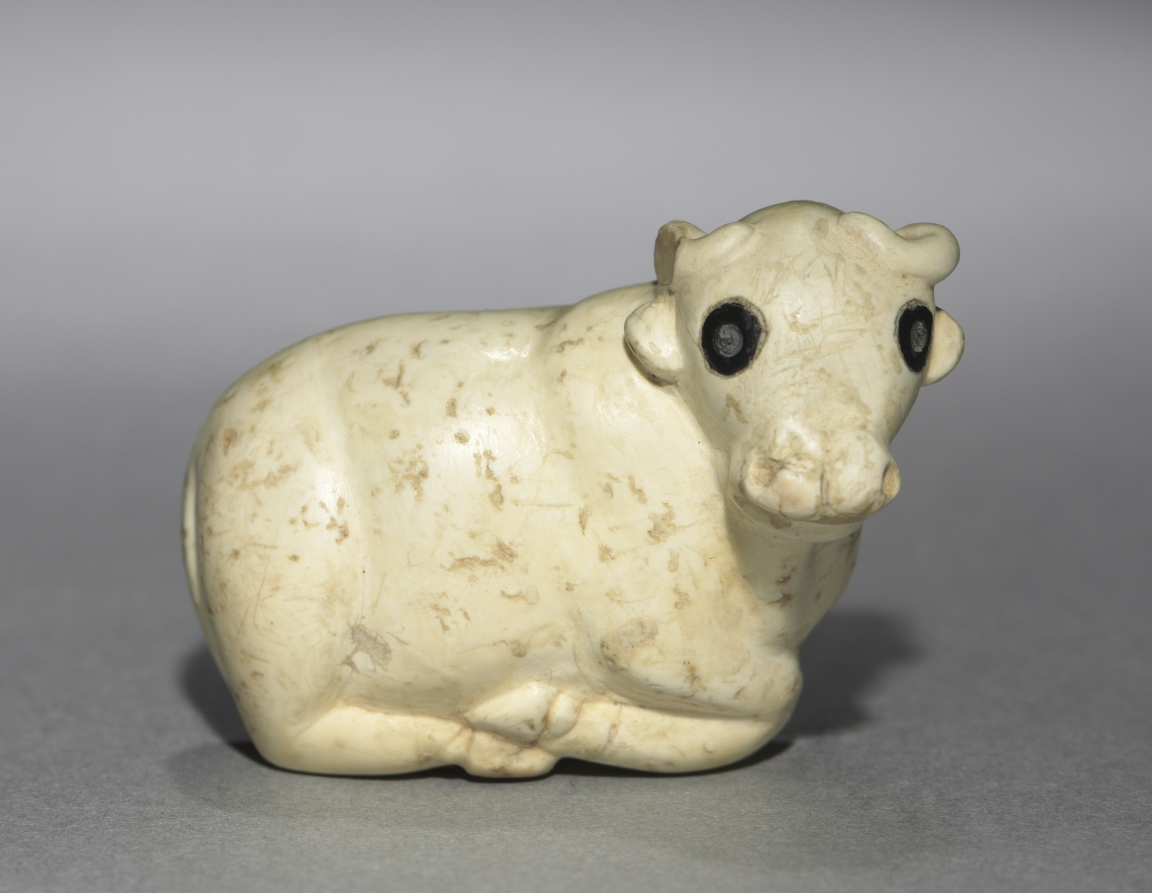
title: Amulet Seal in the Form of a Bull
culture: Mesopotamia, Sumerian, Iraq, Early Bronze Age I (c. 3300–3000 BCE)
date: c. 3250 BCE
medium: limestone with black stone inlaid eyes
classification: Amulets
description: The underside of this figure is incised with two running animals to make a seal; when pressed into a soft material, it leaves an impression.